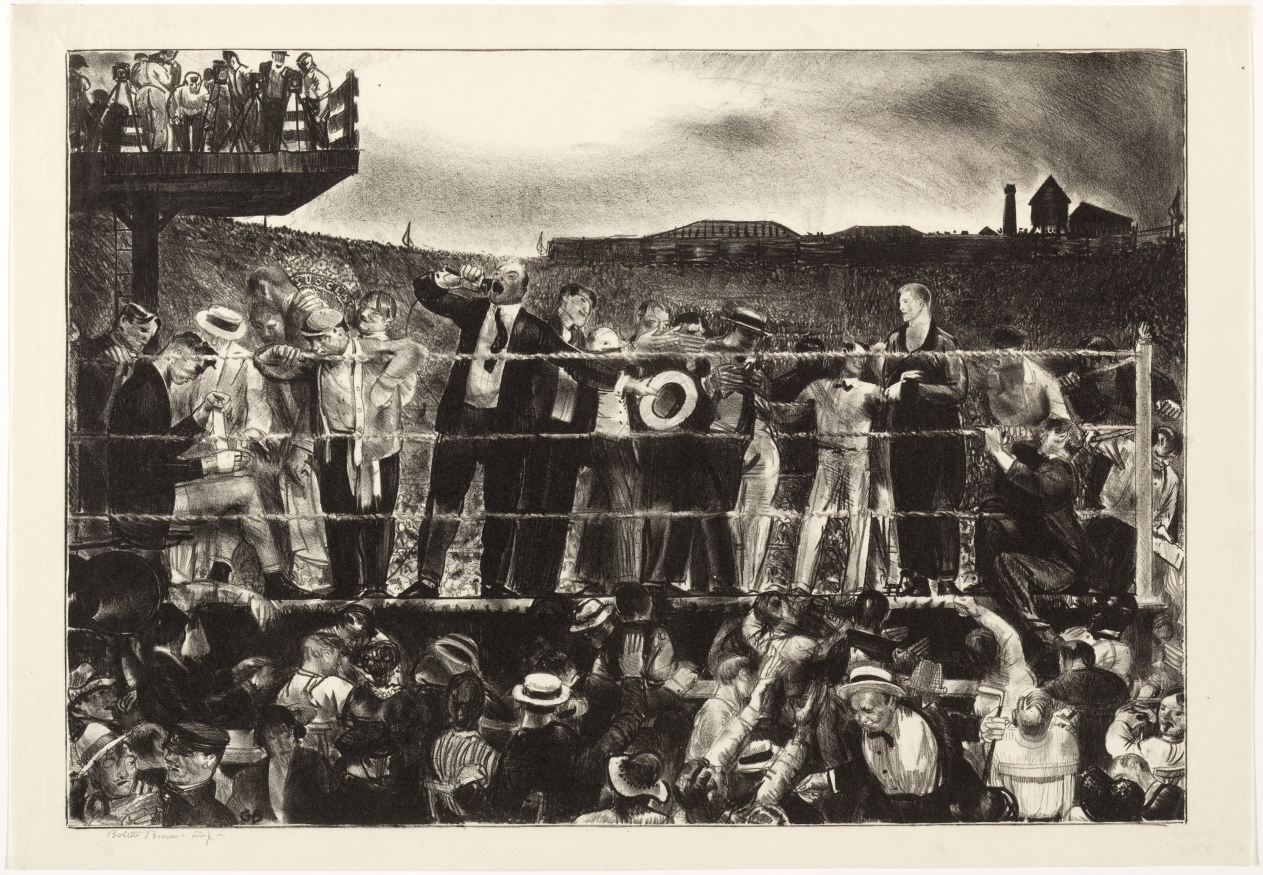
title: Introducing Georges Carpentier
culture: America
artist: George Bellows (American, 1882–1925)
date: 1921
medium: lithograph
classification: Print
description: Promoted as the “battle of the century,” the match between French pugilist Georges Carpentier and American Jack Dempsey took place on July 2, 1921, in Jersey City at an enormous outdoor arena built specifically for the bout. With the First World War fresh in mind, the crowd favored Carpentier, a twice-decorated pilot in the French Air Force, over Dempsey, who was viewed as a draft evader despite having been exonerated of the charge by a jury the previous year. The match ended quickly with a knockout by Dempsey in the fourth round. The event attracted more than 80,000 spectators and generated boxing’s first million-dollar gate. A large contingent of reporters, photographers, and motion picture cameramen—several of whom are gathered on a platform at the upper left—covered the spectacle. Bellows, on assignment for the New York World newspaper to sketch the proceedings, sat in the press section shown in the foreground, although he did not record himself among the excited throng.